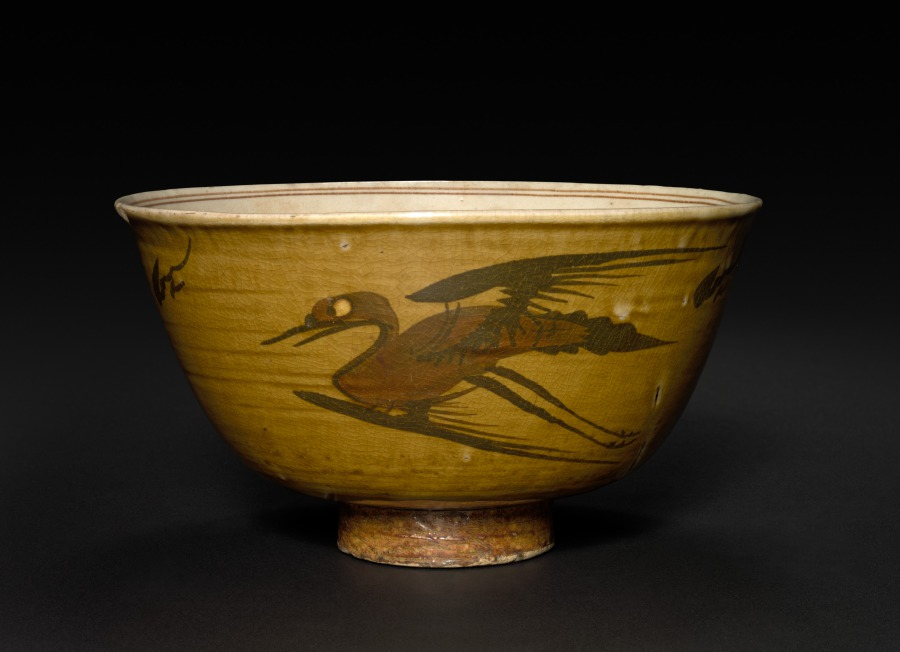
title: Bowl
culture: China, Ming dynasty (1368–1644)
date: 1368–1644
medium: stoneware, Cizhou ware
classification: Ceramic